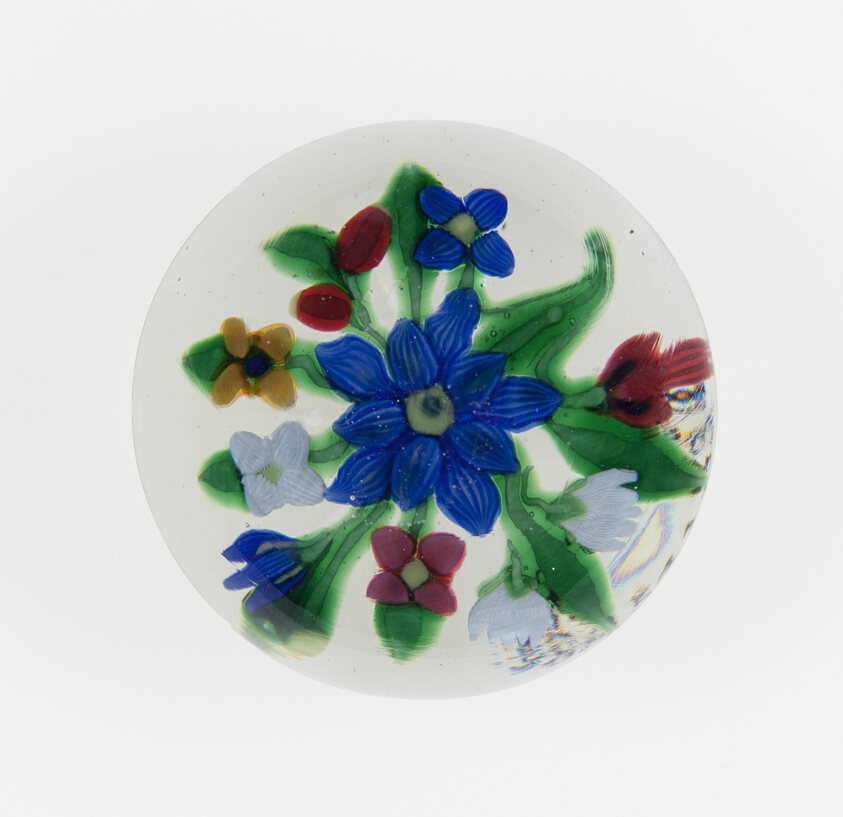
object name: Glass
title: Paperweight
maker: Saint-Louis Glassworks (Cristalleries de Saint-Louis); Lorraine, France, founded 1586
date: c. 1845–60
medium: Glass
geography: Saint-Louis-lès-Bitche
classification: paperweight; glass